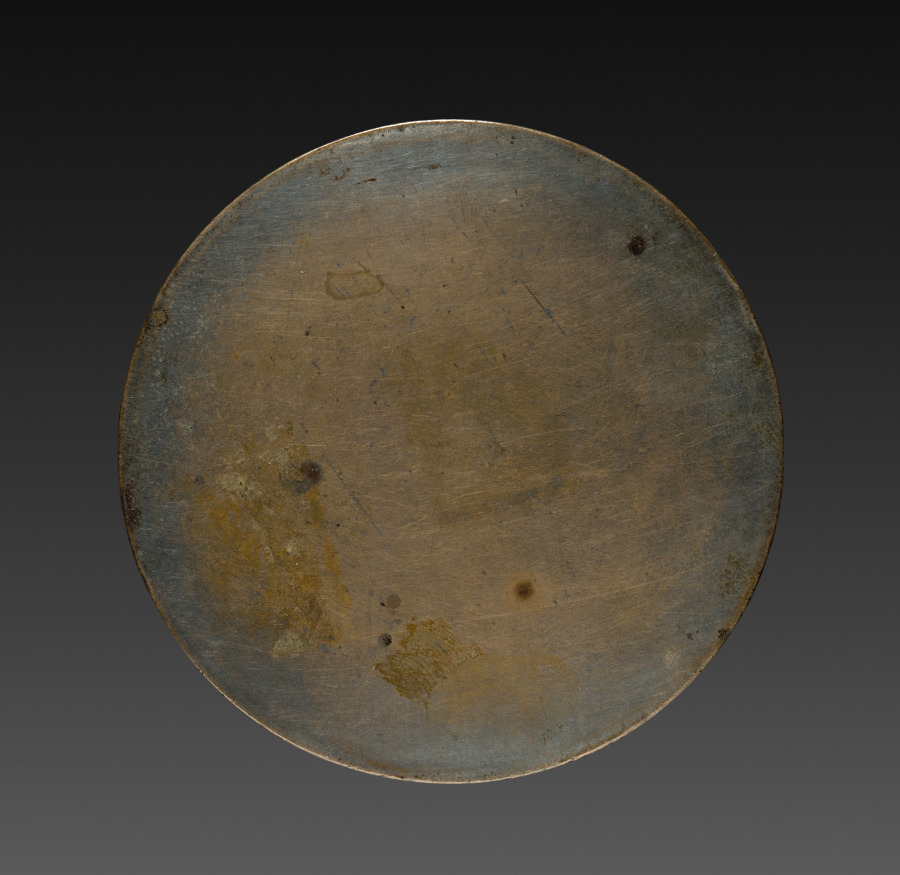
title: Mirror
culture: Japan, Edo period (1615–1868)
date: 1615–1868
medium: bronze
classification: Metalwork